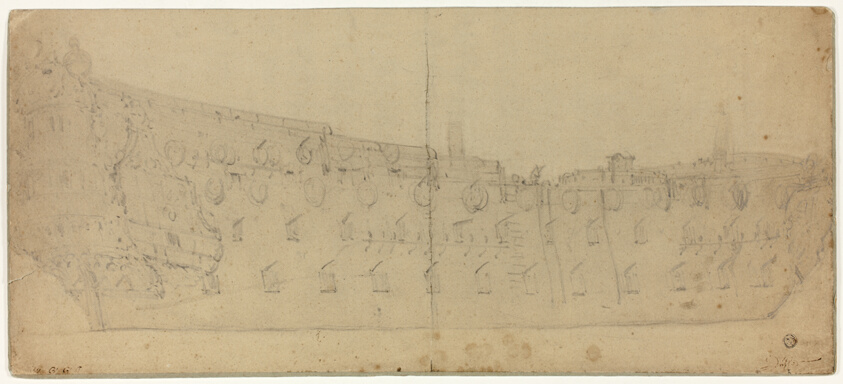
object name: Drawing and Watercolor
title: Side View of Man o' War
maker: Willem van de Velde, I (Dutch, c. 1611-1693)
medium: Graphite on tan laid paper, laid down on wood-pulp board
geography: Holland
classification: graphite; paper; drawings (visual works); prints and drawing